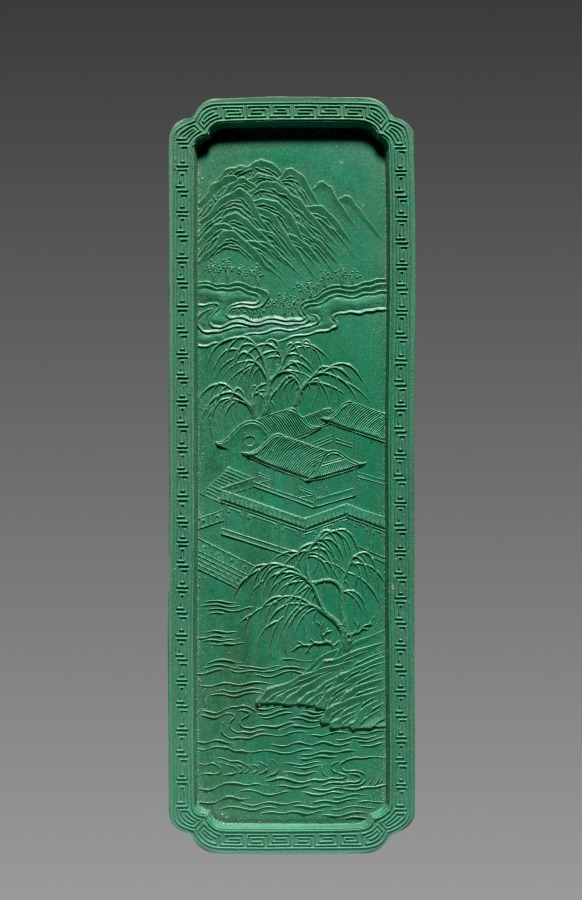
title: Ink Stick from an Imperially Commissioned Set of Ink Stick with Images and Poems of Famous West Lake Sites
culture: China, Qing dynasty (1644–1911), Qianlong reign (1736–95)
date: 1780–94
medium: Molded ink in green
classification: Miscellaneous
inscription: 乾隆年製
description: This is one of ten ink cakes of different shapes and colors stored in an exquisite lacquer box. Each is inscribed in gold with a poem by the Qianlong emperor, praising the ten famous sights of the Westlake in Hangzhou, near Shanghai. The Westlake is famous for its natural beauty; it was a favorite imperial destination and remains a tourist attraction today. Ink cakes (also called ink sticks) are dissolved with the addition of water and ground on the surface of a flat stone into liquid ink for painting and calligraphy. The precious ink cakes here, however, have never been used.